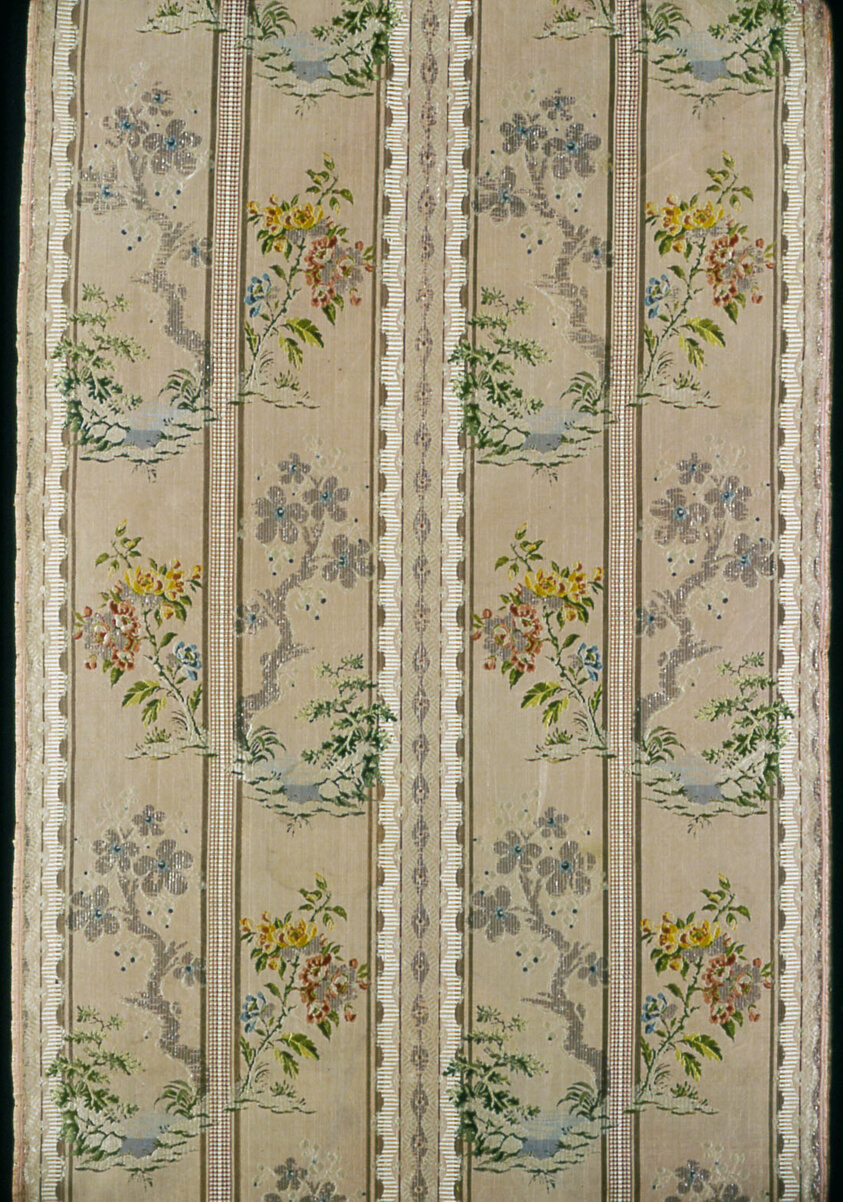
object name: Textile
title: Panel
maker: Probably France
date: c. 1765/70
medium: Silk and gilt-metal strips, warp-stripe plain weave with supplementary patterning warps, supplementary patterning wefts and supplementary brocading wefts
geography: France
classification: textile; weaving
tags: foliage, water